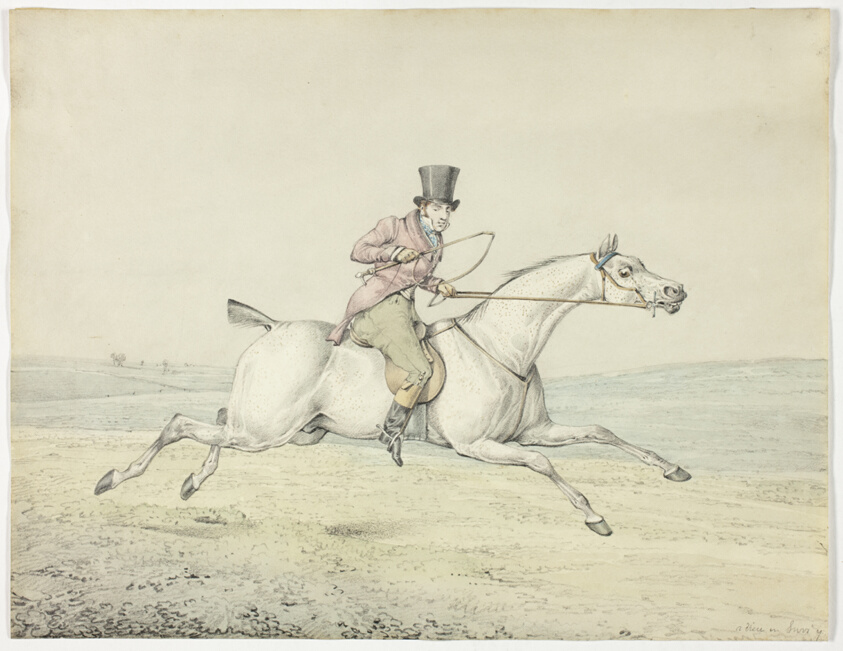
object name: Drawing and Watercolor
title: Oh, You Should Have Seen Old Tom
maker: Henry Alken (English, 1785-1851)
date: 1827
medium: Watercolor and graphite on paper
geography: England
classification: watercolor; drawings (visual works); prints and drawing